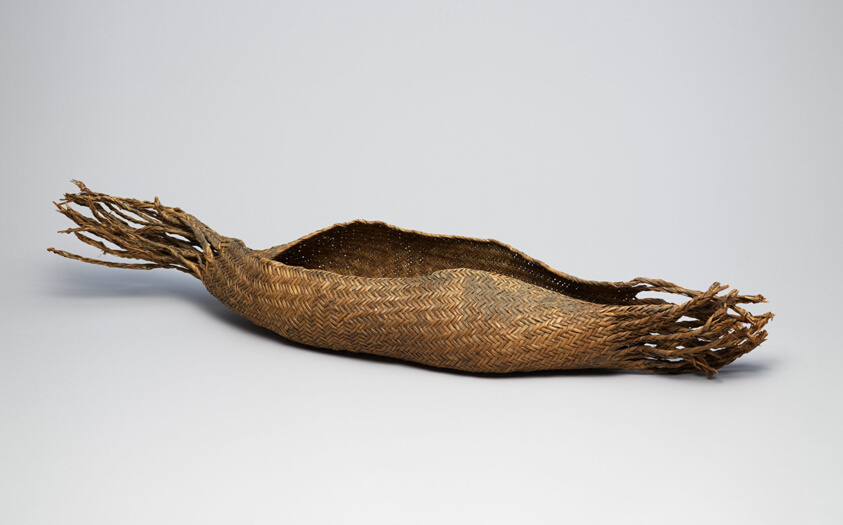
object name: Religious/Ritual Object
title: Ritual Cache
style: salado, mimbres, mogollon, americas, southwest, native american, native north american, Arts of the Americas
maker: Salado branch of the Mogollon; New Mexico, United States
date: 1300–1400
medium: Wood, stone, plant fibers, cotton, feathers, hide, and pigment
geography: New Mexico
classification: ceremonial object; ceramics; masks; ritual objects; art of the americas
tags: ceremonial objects, figures (representations), snakes, ritual objects, mountain lions, indigenous, nature, altar, offering, feathers, corn, lightning, fertility, supernatural, basketry, hunting